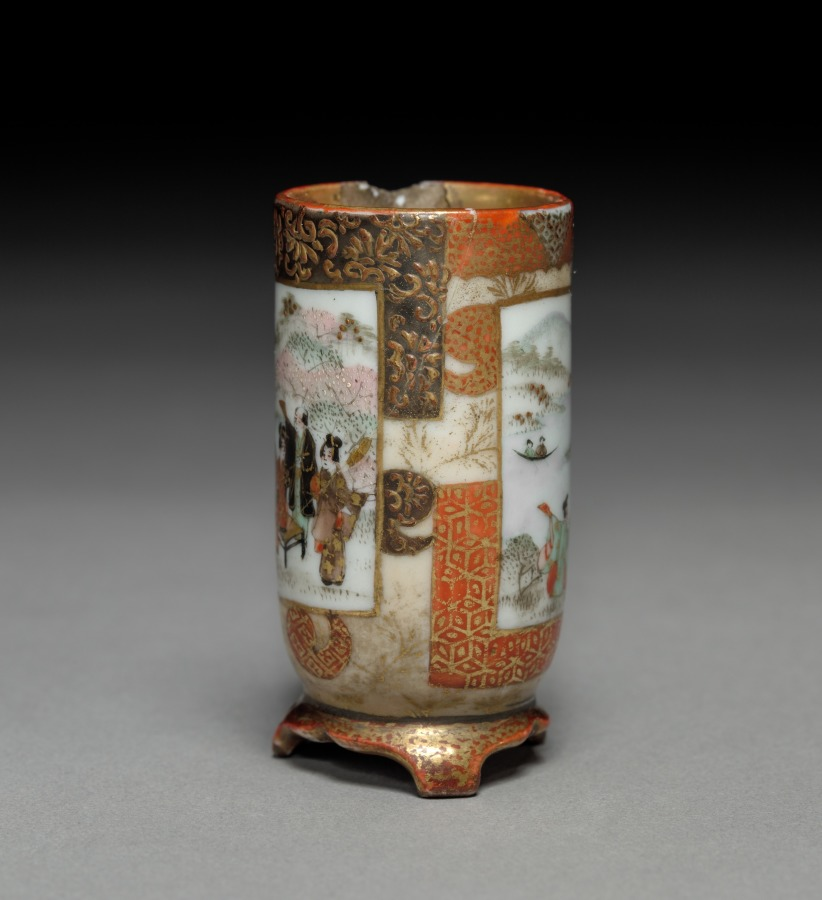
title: Miniature Vase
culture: Japan, Edo period (1615–1868) to Meiji period (1868–1912)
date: 1800s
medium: overglaze porcelain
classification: Ceramic